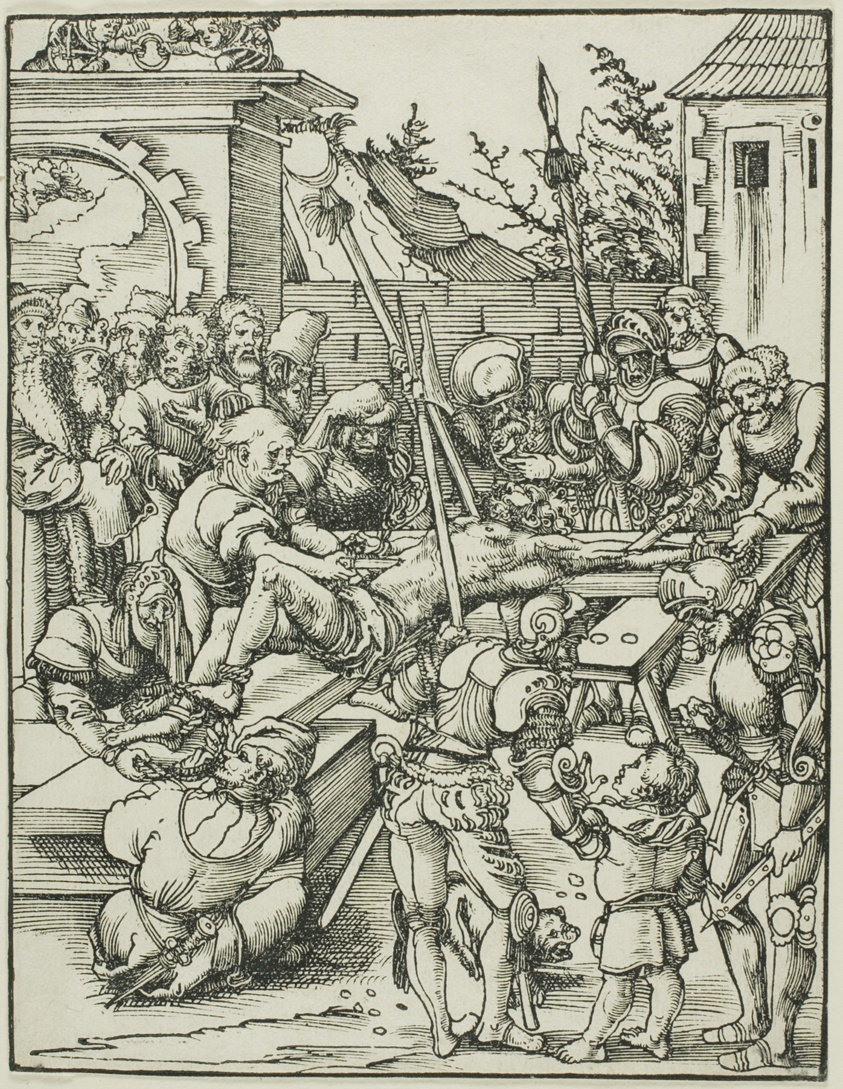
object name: Print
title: Saint Bartholomew, from The Martyrdom of the Apostles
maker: Lucas Cranach the Elder (German, 1472-1553)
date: c. 1512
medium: Woodcut in black on ivory laid paper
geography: Germany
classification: woodcut; print; prints and drawing